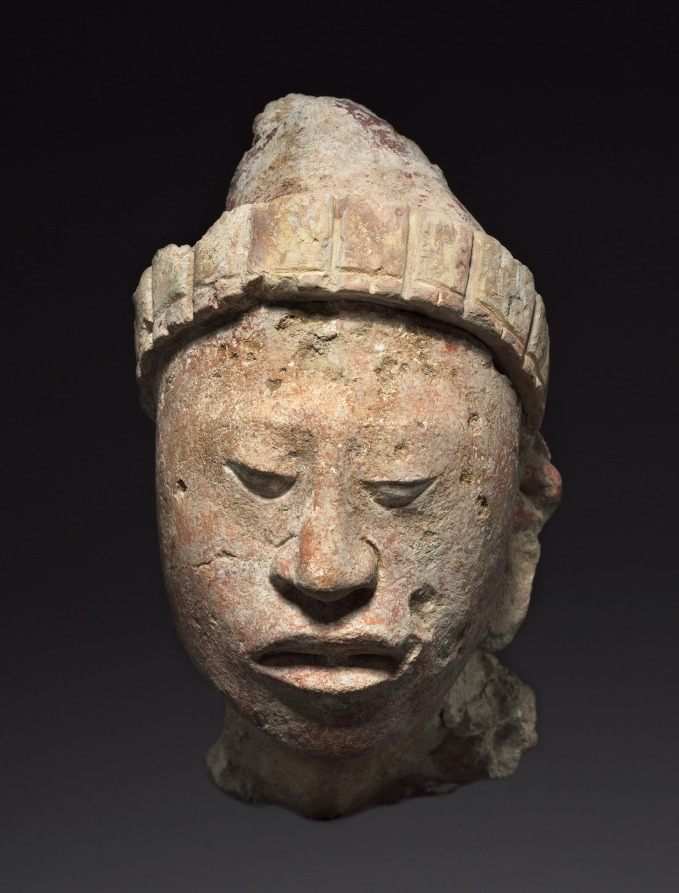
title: Head from a Building's Façade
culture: Mexico, Campeche, Maya style (250-900)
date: 250–900 CE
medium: stucco, paint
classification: Sculpture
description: The Maya often lavishly decorated the exteriors of buildings, transforming them into elaborate sculptural works in their own right. This sensitively modeled head, made from fragile stucco, would have been affixed to the façade of a palace or temple via the tenon (projection) at the back of the head. The rest of the body may have been modeled separately.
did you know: Maya elites practiced cranial modification on infants to achieve the sloped profile seen in this tenoned head.